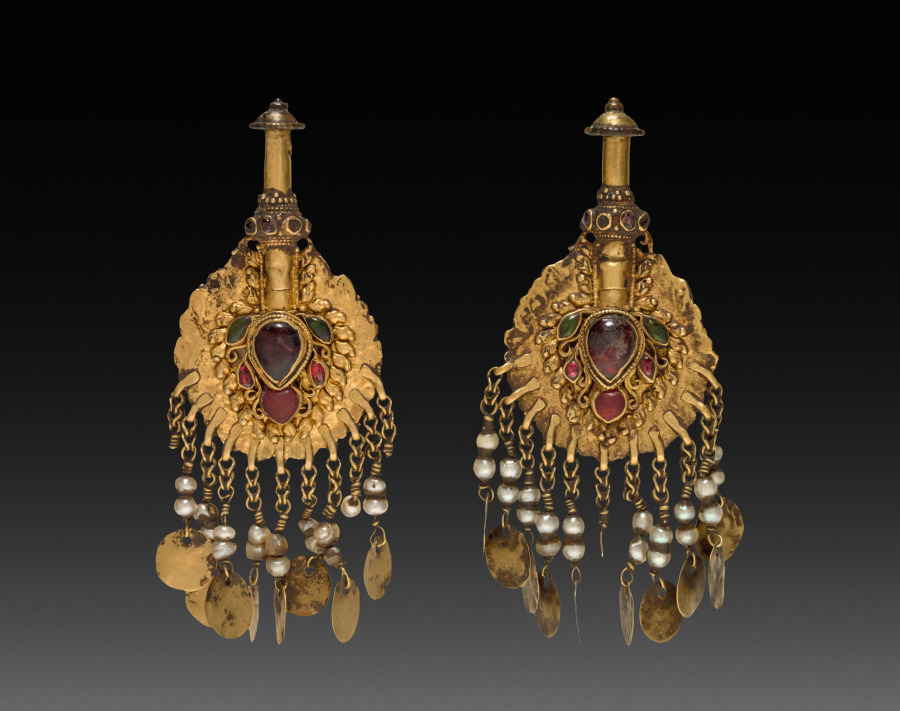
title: Pair of Earrings with Vishnu Riding Garuda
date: 1600s or 1700s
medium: Gold set with precious and semiprecious stones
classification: Jewelry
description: These earrings were made to hang on large bronze sculptures of deities worshipped in Nepalese temples. Nepalese craftsmen excelled at the detailed encrustation of jewels to depict complex figural imagery. They shaped gold wires into a framework, then inserted polished stones into the spaces, held in place with an adhesive. Four-armed Vishnu is made of sapphires; his mount the man-eagle appears to be made of carnelian and spinel with wings of turquoise.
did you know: The father of Jeptha Homer Wade II (1857–1926), who owned these earrings, gave the land for the museum and Wade Oval.